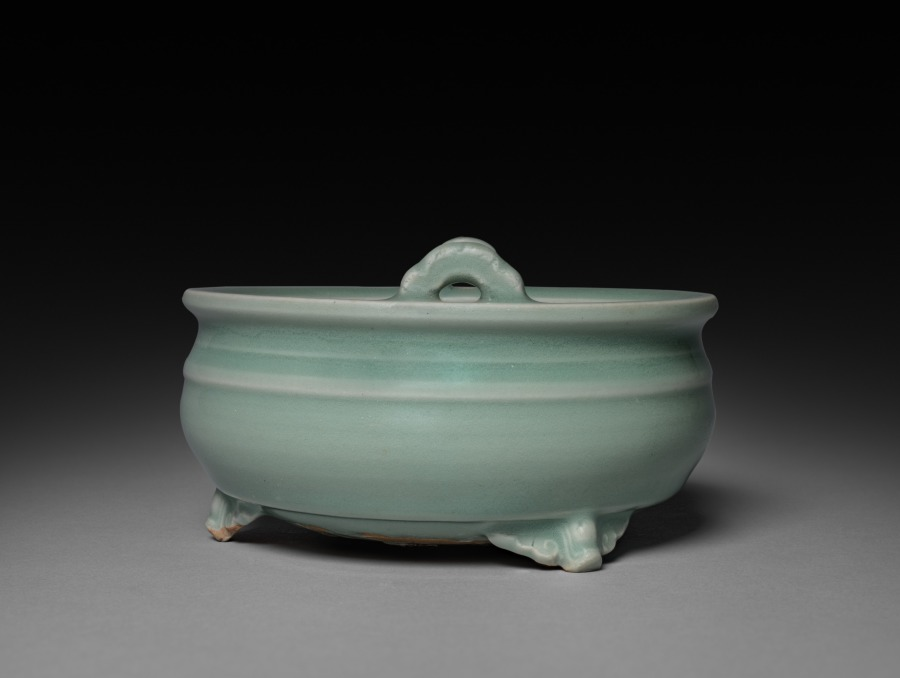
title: Incense Burner: Longquan Ware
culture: China, Southern Song dynasty (1127-1279)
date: S. Sung-Yuan Dynasty, 13th-14th Century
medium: glazed porcelain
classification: Ceramic